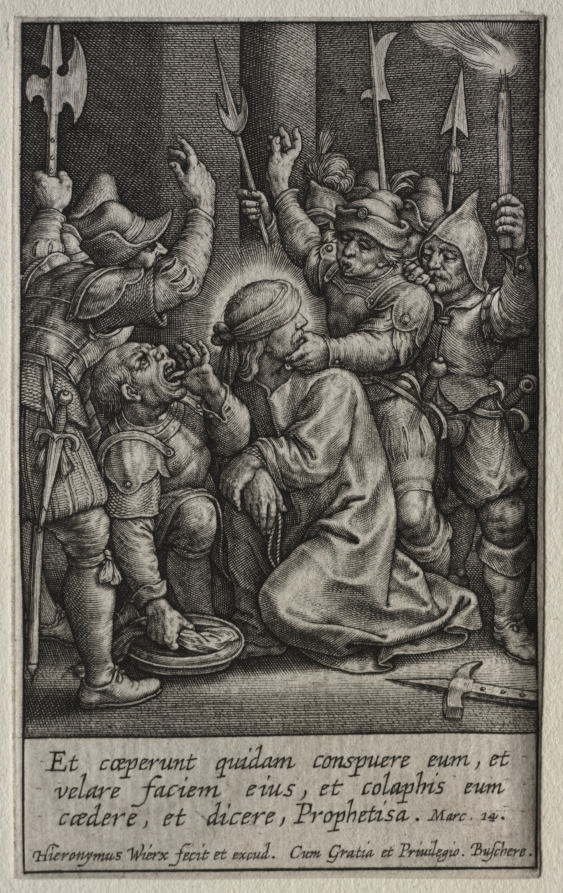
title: The Passion: The Mocking of Christ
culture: Flanders, late 16th-early 17th century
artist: Hieronymus Wierix (Flemish, 1553–1619)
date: before 1619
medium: engraving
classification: Print